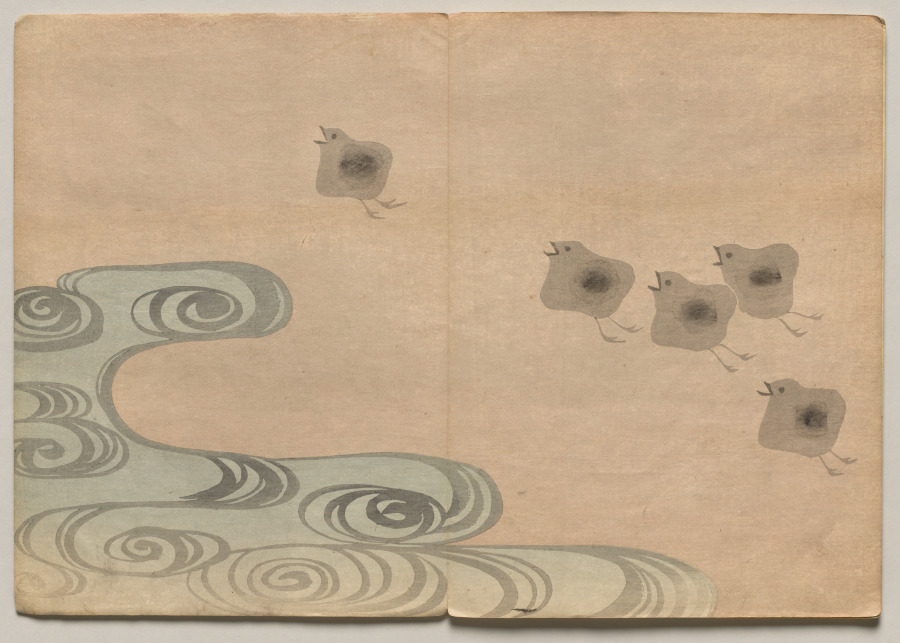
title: Scene from The Kōrin Picture Book (Volume 1)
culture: Japan, Edo period (1615–1868)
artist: Nakamura Hōchū (Japanese, d. 1819)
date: 1800s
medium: color woodblock printed book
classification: Bound Volume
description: Ogata Korin (1658-1716) was one of the most admired artists of Rimpa, or "decorative school painting." These books by the charming later-generation Rimpa artist Hochu record Korin's inventive designs.